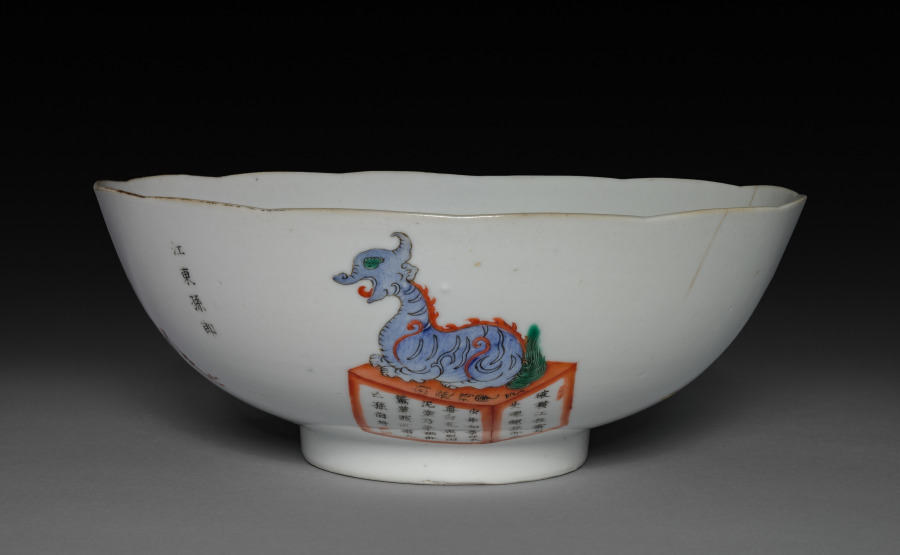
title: Bowl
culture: China, Qing dynasty (1644-1911)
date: 1821–1850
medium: porcelain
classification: Ceramic